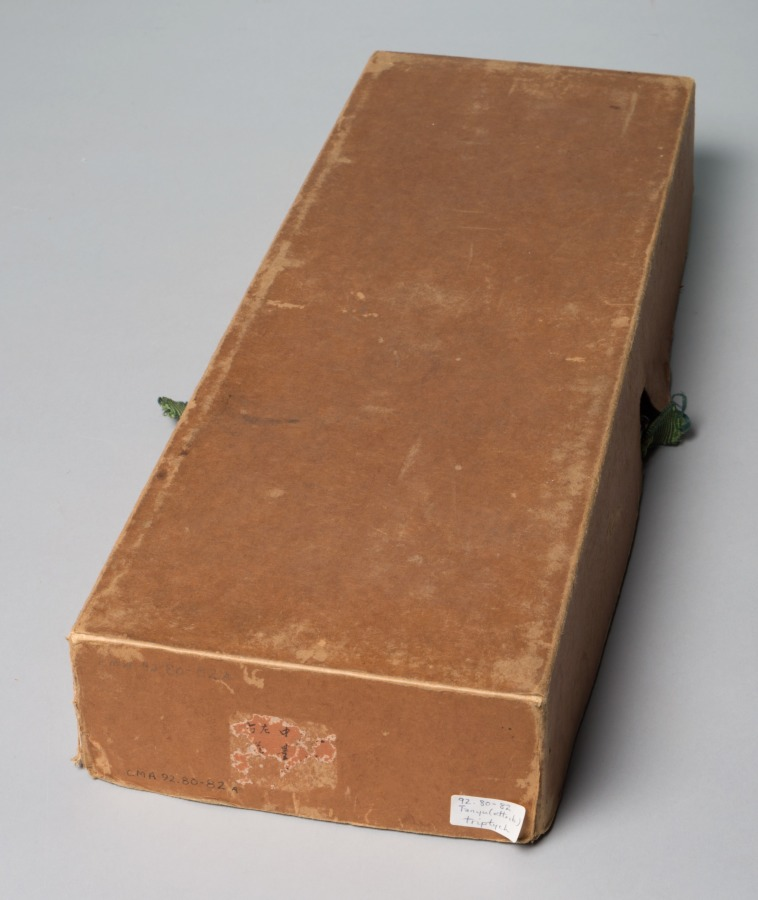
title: Sparrows on Blossoming Plum; A Sage with Tiger; Chinese Bird on Snow-Laden Branch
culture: Japan, Edo period (1615–1868)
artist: Kano Tan’yū (Japanese, 1602–1674)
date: 1661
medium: Triptych of hanging scrolls; ink and slight color on silk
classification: Painting